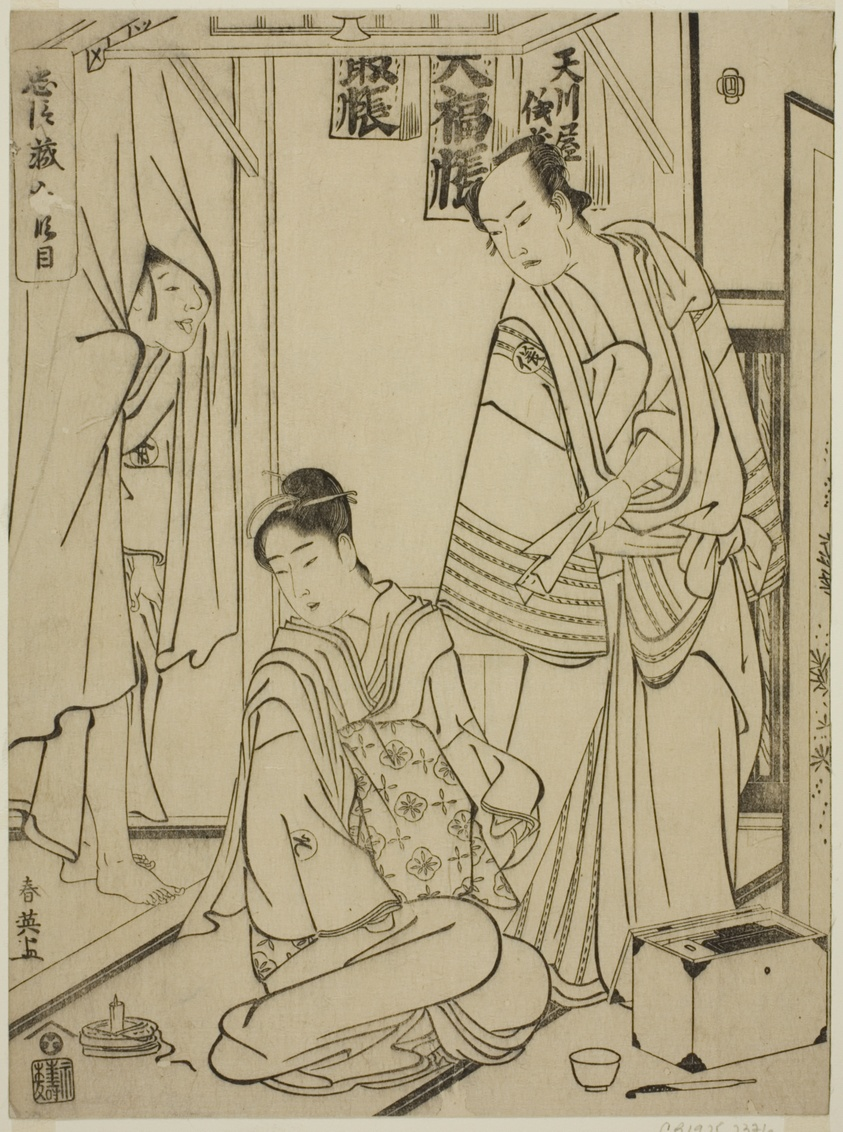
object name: Print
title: Act Ten: The Amakawaya House from the play Chushingura (Treausry of the Forty-seven Loyal Retainers)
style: Japanese (culture or style)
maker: Katsukawa Shun'ei (Japanese, 1762-1819)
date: early 1790s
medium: Woodblock print; chuban, keyblock proof impression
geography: Japan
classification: woodblock print; print; asian art; woodblock